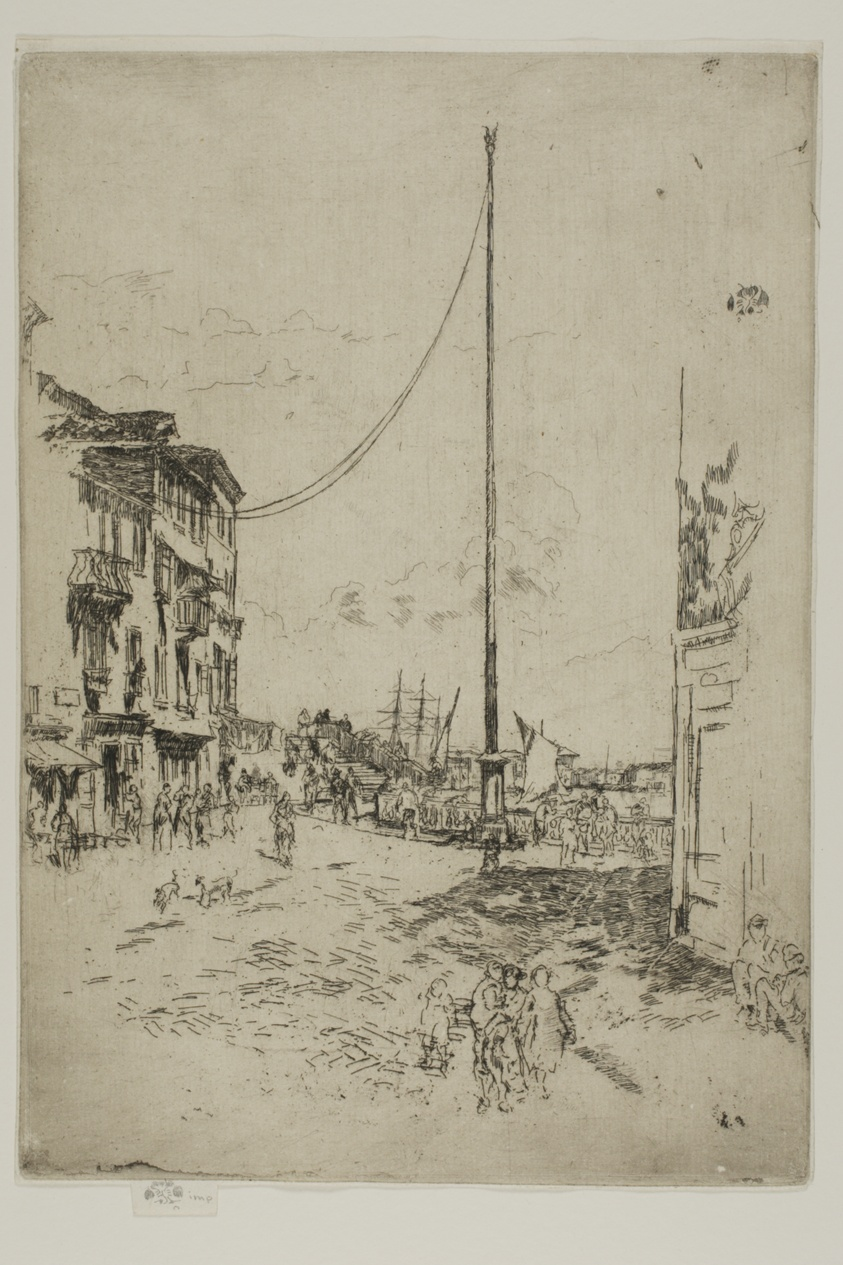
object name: Print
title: The Little Mast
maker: James McNeill Whistler (American, 1834-1903)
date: 1879/80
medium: Etching and drypoint with foul biting in black ink on ivory laid paper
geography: United States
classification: etching; drypoint; foul biting; print; prints and drawing; paper